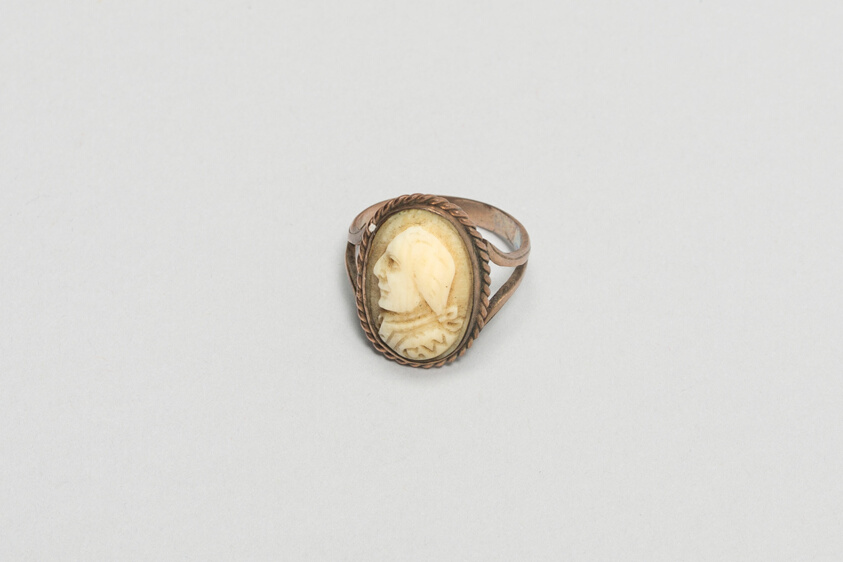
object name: Decorative Arts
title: Ring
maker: Artist unknown (American, 19th century)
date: 1800–1900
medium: Gold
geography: United States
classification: ring (jewelry); jewelry; american decorative arts; american arts; decorative arts